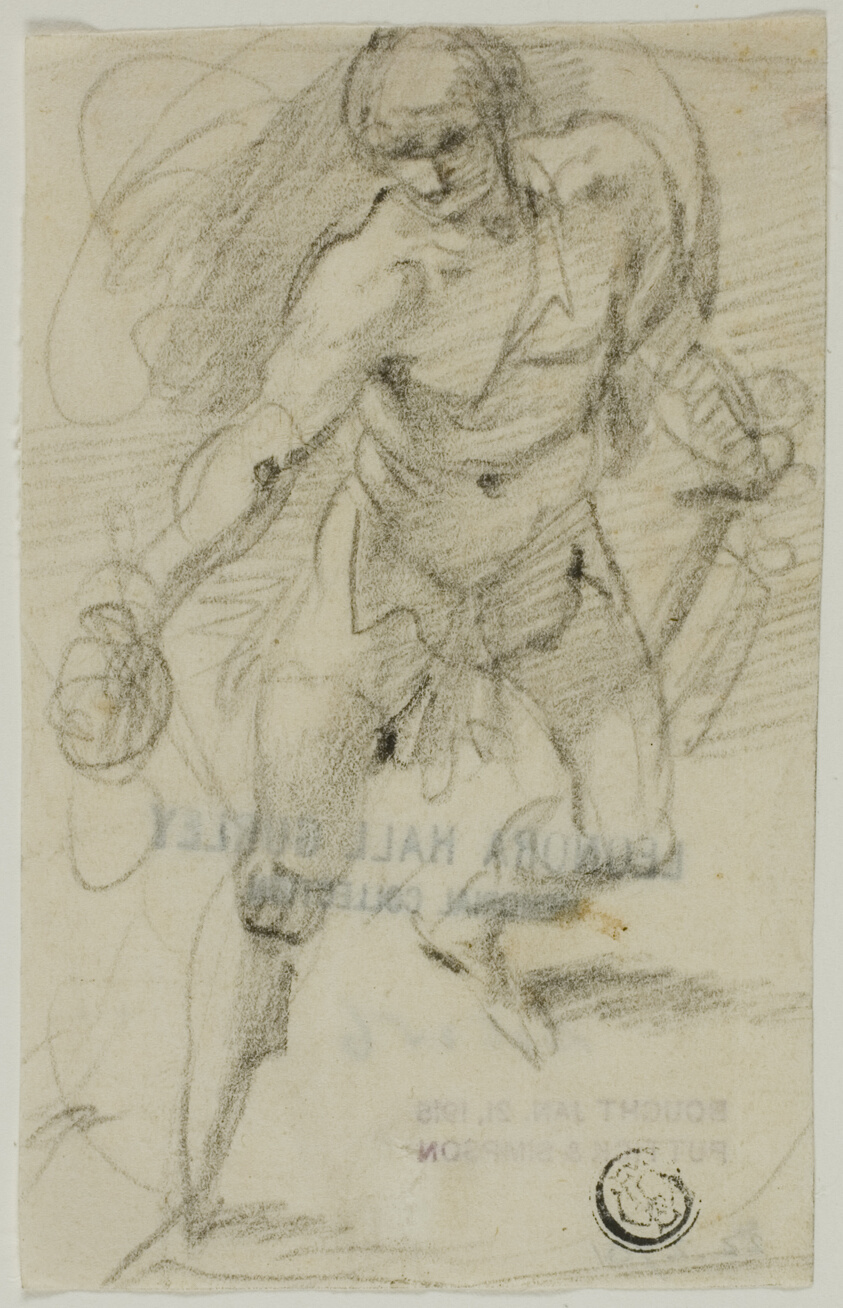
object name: Drawing and Watercolor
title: David with the Head of Goliath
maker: Giuseppe Cesari, called Il Cavalier d'Arpino; Italian, 1568-1640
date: 1591/93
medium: Black chalk on ivory laid paper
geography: Italy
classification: chalk; drawings (visual works); prints and drawing